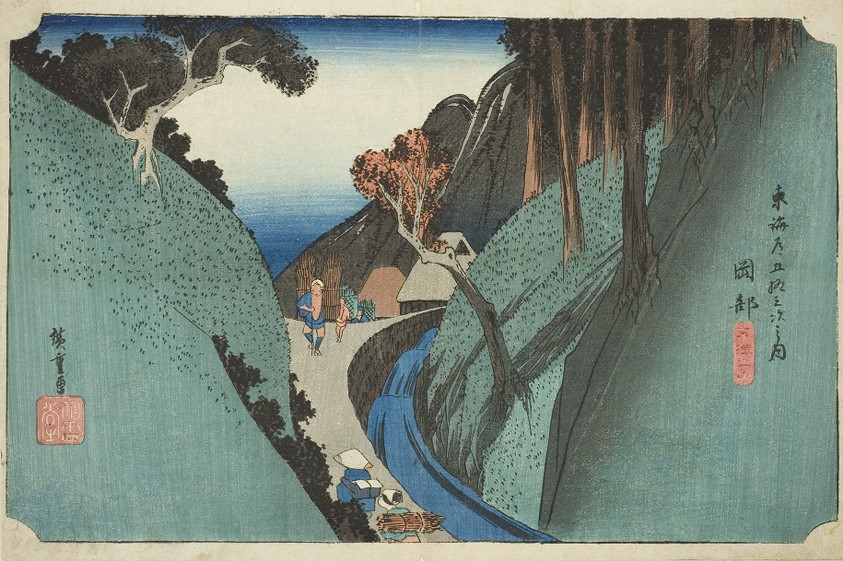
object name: Print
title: Okabe: Utsu Mountain (Okabe, Utsu no yama), from the series "Fifty-three Stations of the Tokaido Road (Tokaido gojusan tsugi no uchi)," also known as the Hoeido Tokaido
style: Japanese (culture or style)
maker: Utagawa Hiroshige 歌川 広重; Japanese, 1797-1858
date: c. 1833/34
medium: Color woodblock print; oban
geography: Japan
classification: woodblock print; print; asian art